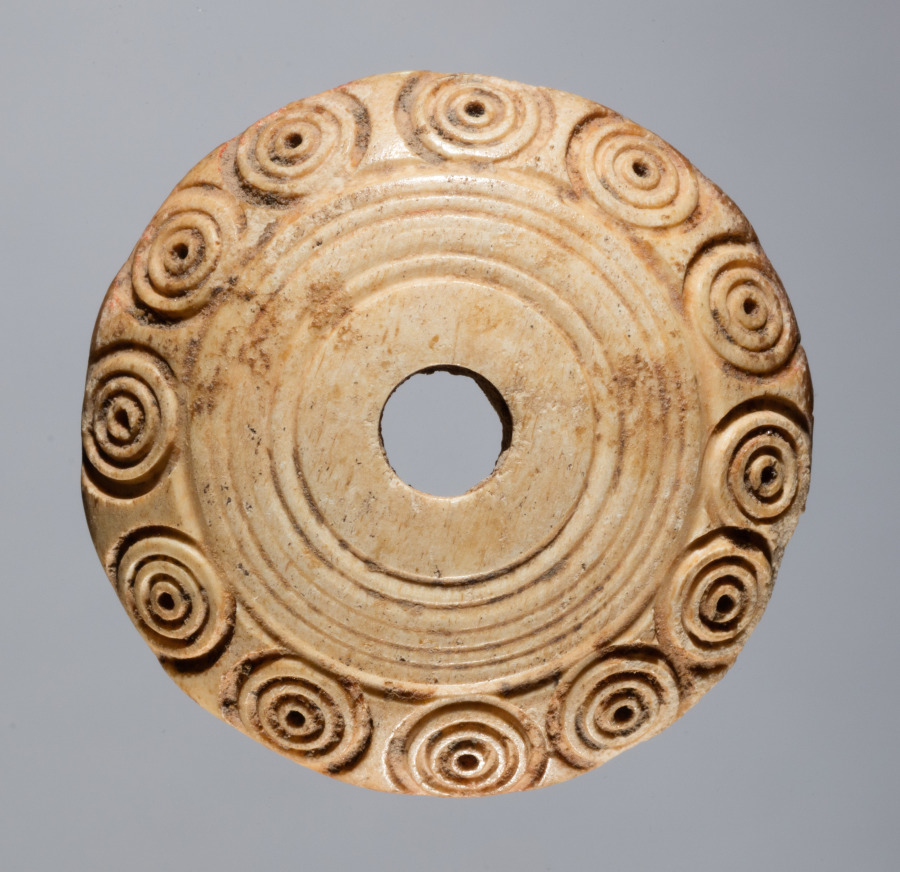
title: Spindle Whorl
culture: Iran, early Islamic period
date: 700s - 900s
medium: bone, incised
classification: Spindle Whorl